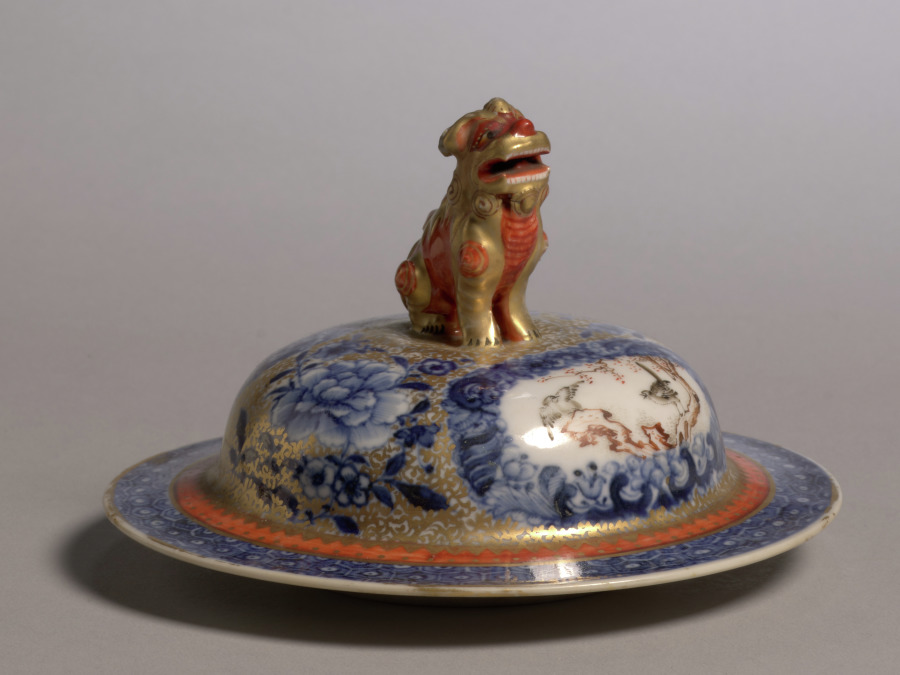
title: Cover for a Vase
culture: China, Chinese Export, 18th century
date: c. 1770–80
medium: porcelain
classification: Ceramic